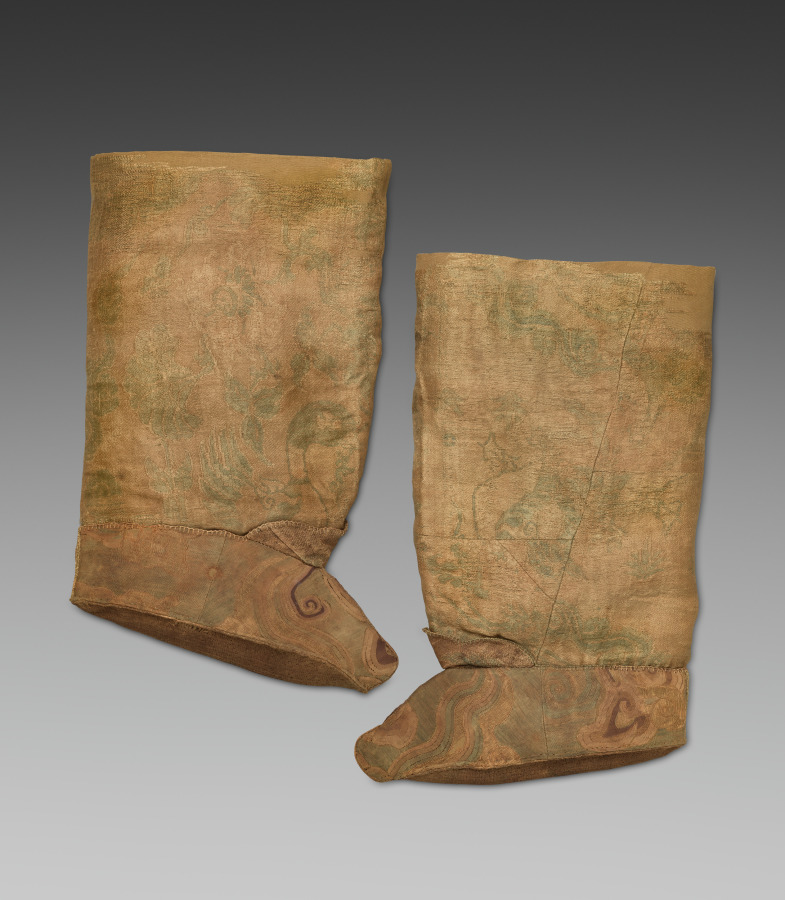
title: Pair of Boots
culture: China, Northern, Liao dynasty (907-1125)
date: 1000–1125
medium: Silk: compound twill; silk and gold: tapestry; silk: tabby, gauze, batting; leather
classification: Garment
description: The fabric and tailoring of garments have always defined social status. For these boots, different outer fabrics were used: a patterned silk for the leg portion, and tapestry (kesi) for the foot. Since both were considered luxury fabrics, they were pieced together from remnants too precious to discard. Consequently, the silk pattern was not used in relation to the form of the boot, as seen in some other imperial boots. By contrast, these boots would have been made for a court official, not a member of the imperial family. The patterned silk was woven with geese flanking a vase of flowers on a stand and surrounded by cloud scrolls. The Chinese motif of flowers arranged in a vase was adopted by the Liao during the 11th century and indicates an 11th- or early 12th-century date for the boots.